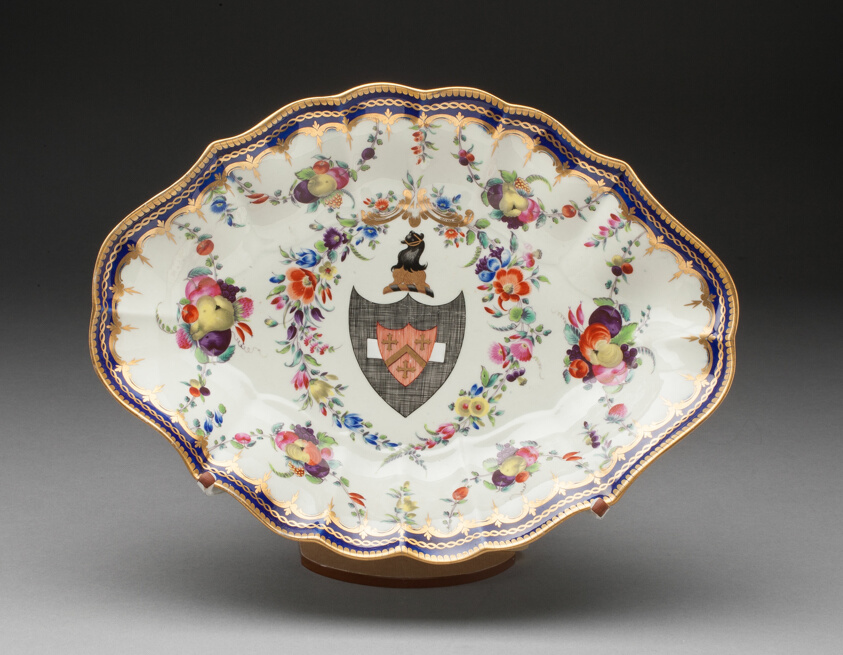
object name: Ceramics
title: Dessert Dish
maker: Worcester Porcelain Factory (Flight Period, 1783-1792); Worcester, England, founded 1751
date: c. 1790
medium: Soft-paste porcelain, polychrome enamels and gilding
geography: Worcester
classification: vessel for serving food; dish (vessel); porcelain; european decorative arts; ceramics